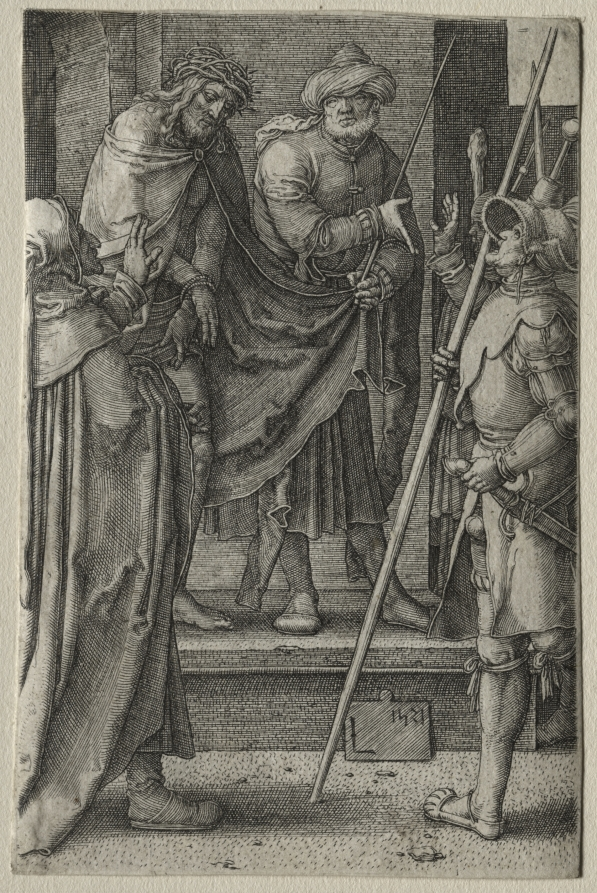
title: The Passion: Christ Presented to the People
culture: Netherlands, 16th century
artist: Lucas van Leyden (Netherlandish, 1494–about 1533)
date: 1521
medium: engraving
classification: Print